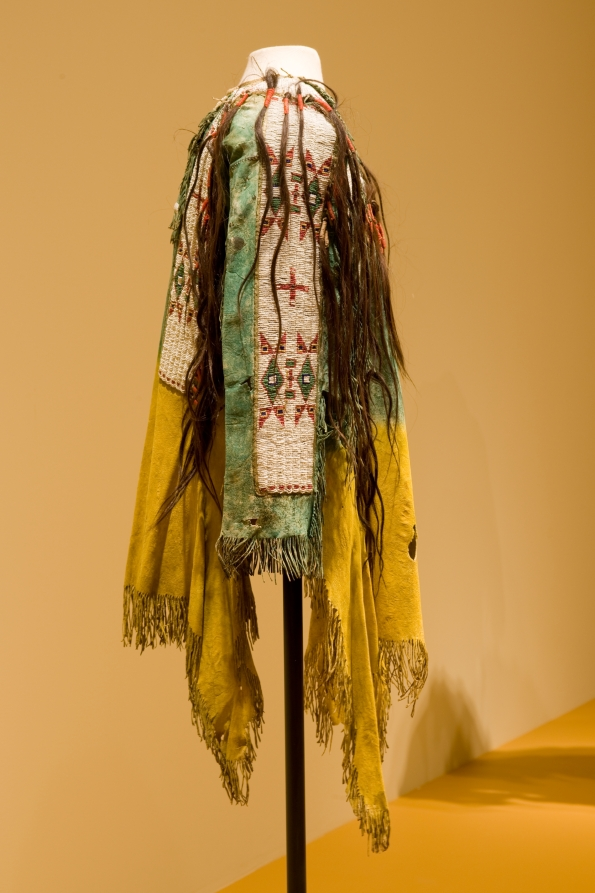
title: Hide Shirt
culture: America, Native North American, Central Plains, Lakota Sioux, 19th century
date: c. 1890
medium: hide, pigment, glass beads, human hair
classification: Textile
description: Traditionally, only Lakota (Sioux) head chiefs had the right to wear painted shirts, an honor they earned through sacrifice and bravery but lost by failing in their responsibilities. By the time this example was created, European Americans had confined the Lakota to reservations, and painted shirts had become the privilege of battle veterans rather than of active warriors. Family members probably donated the locks of hair, each representing a war exploit.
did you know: Only Lakota (Sioux) chiefs had the right to wear painted shirts, an honor they earned through bravery.